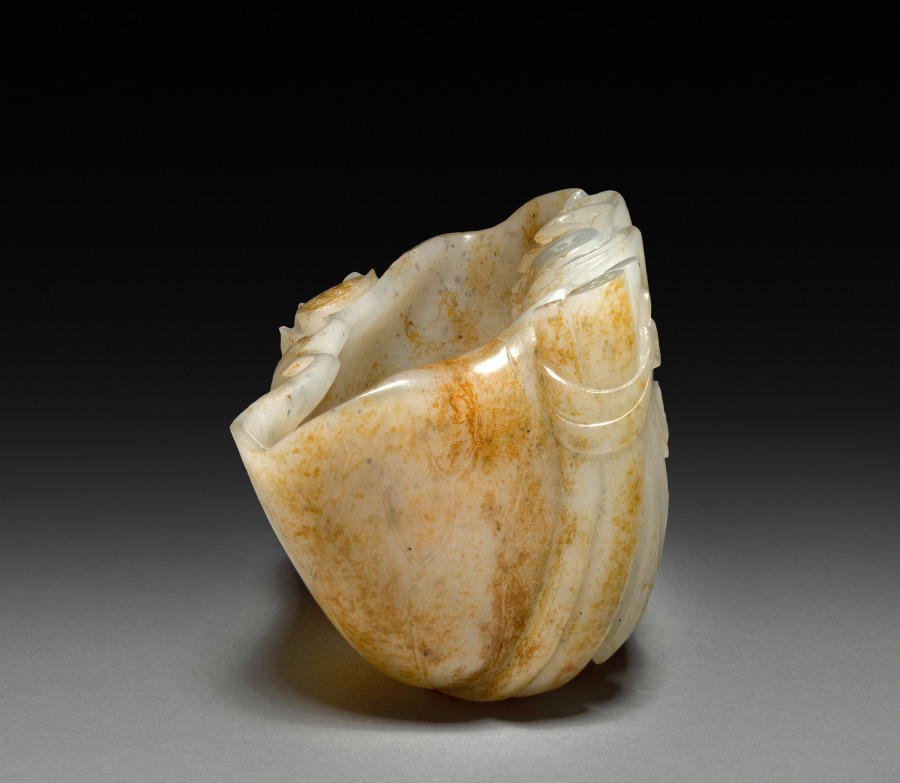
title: Cup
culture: China, Qing dynasty (1644-1911), Kangxi reign (1662-1722)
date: 1662–1722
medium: jade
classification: Jade